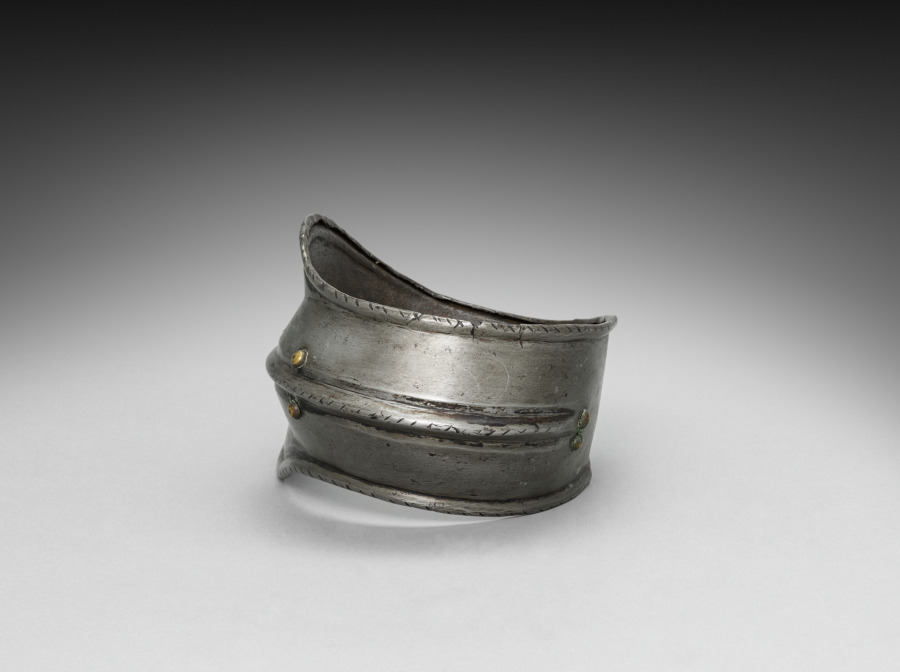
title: Knee Cap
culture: Germany, 19th century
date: 1801–1900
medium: steel with black paint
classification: Arms and Armor